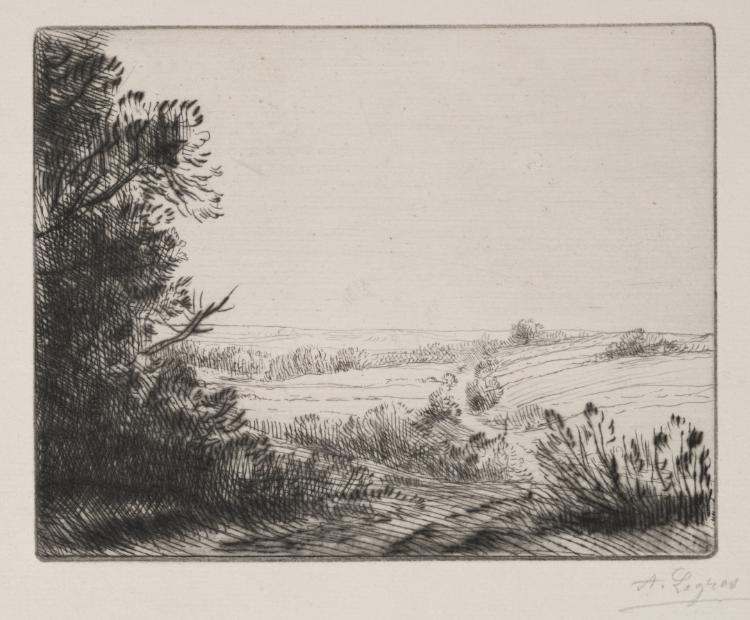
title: The Road to Horville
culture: France, 19th century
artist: Alphonse Legros (French, 1837–1911)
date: c. 1857–1911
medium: etching and drypoint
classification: Print